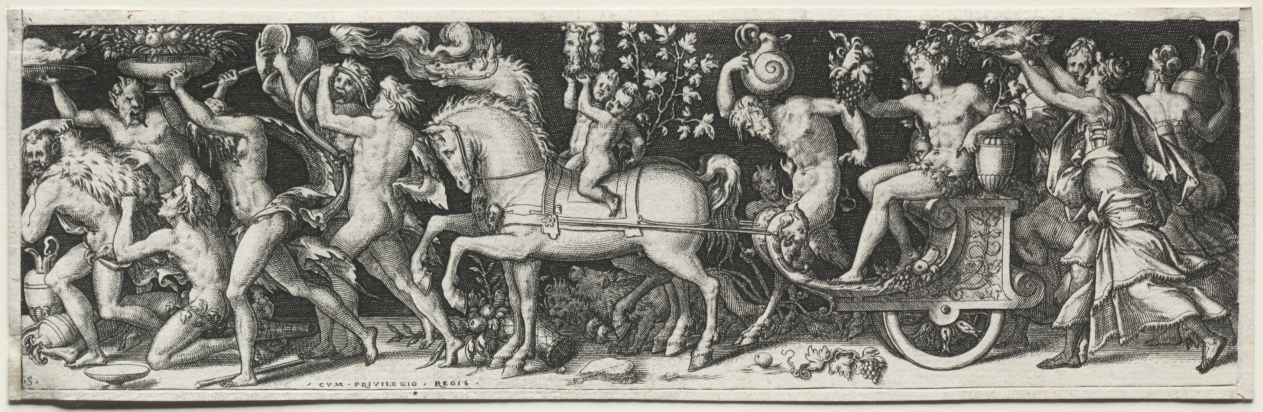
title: Combats and Triumphs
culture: France, 16th century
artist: Etienne Delaune (French, 1518/19-c. 1583)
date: c. 1550–72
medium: engraving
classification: Print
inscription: lower left, in plate: ·S· ; lower left, in plate: · CVM · PRIVILEGIO · REGIS · ; verso, lower right, in graphite: 285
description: Etienne Delaune (French, 1518/19-1583) Combats and Triumphs, probably 1560s Engravings Gift of Leonard C. Hanna 1924.671-.674 The Triumph of Bacchus Battle of Men and Animals Combat of the Naked Men Battle of the Centaurs and the Lapiths The four prints shown here come from a series of twelve known as the Combats and Triumphs. The friezelike composition reflects the artist's study of marble relief carvings on Greek and Roman sarcophagi (coffins), here reduced to a preciously small setting. Against a flat, stagelike background, Delaune's balletic warriors engage in a Mannerist version of artificial war. Etienne Delaune was inspired by the art created at Fontainebleau, but he worked in Paris and then Strasbourg during the late 1500s. His small, exquisitely executed engravings reflect his training as a goldsmith and his work as a medallist.